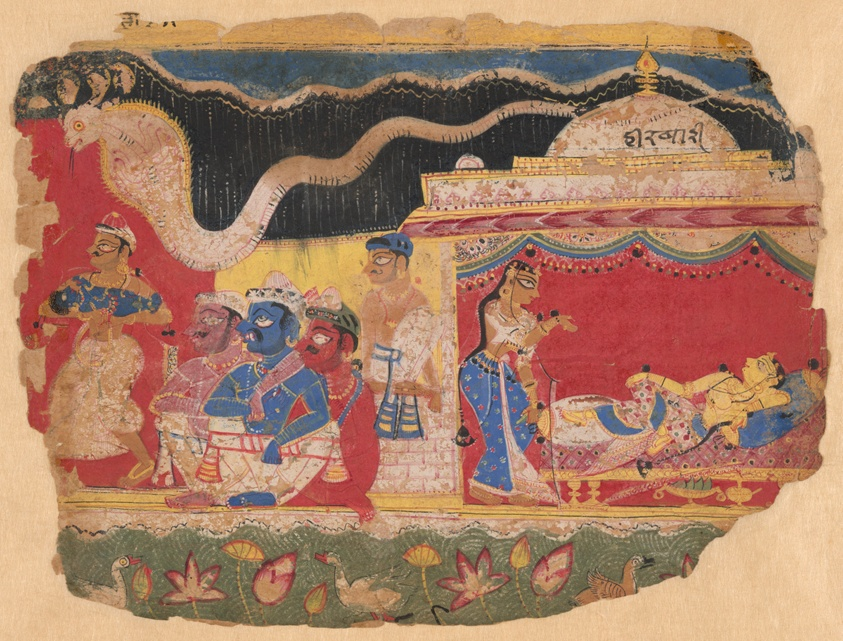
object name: Painting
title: The Infant Krishna Spirited Away by Vasudev, from a copy of the Dispersed Bhagavat Purana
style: South Asian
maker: India; Delhi-Agra region, possibly Mathura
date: c. 1520–1530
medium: Opaque watercolor on paper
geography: India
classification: gouache; painting; asian art